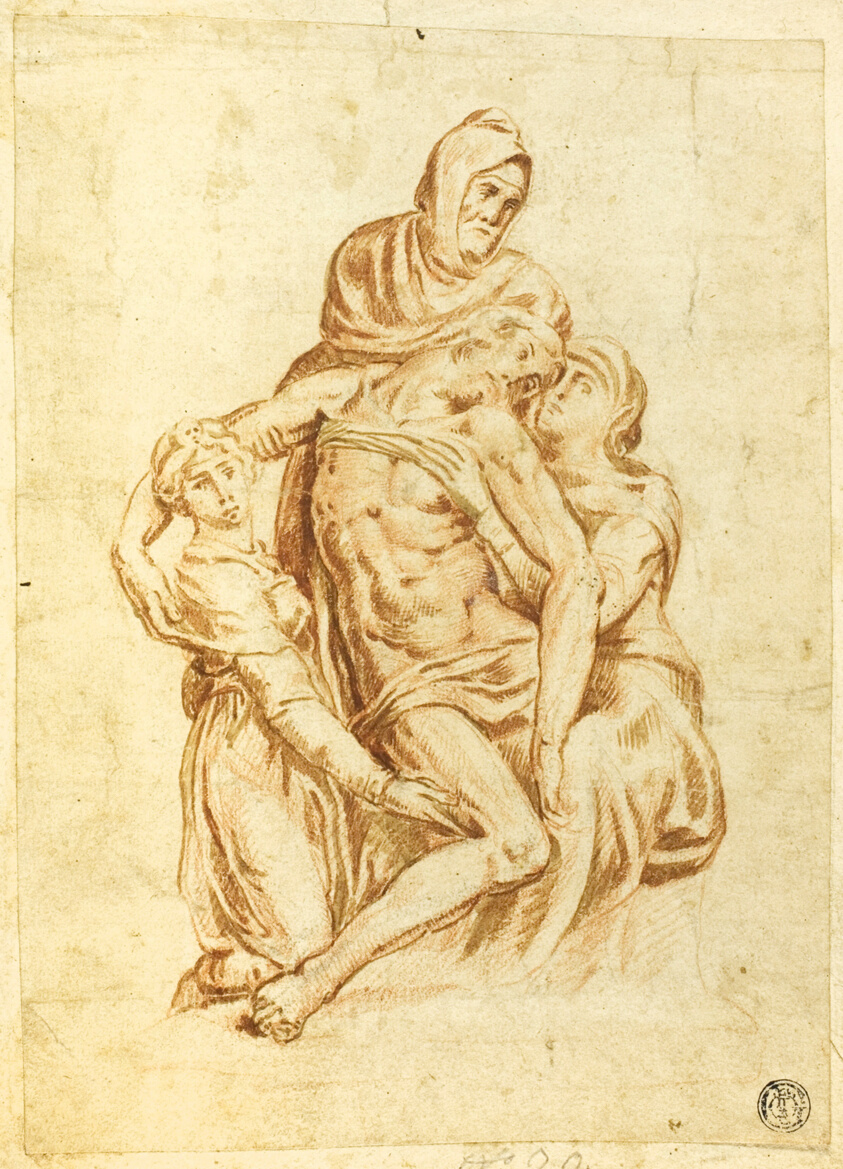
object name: Drawing and Watercolor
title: Deposition of Christ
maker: after Michelangelo Buonarroti; Italian, 1475-1564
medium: Brush and brown ink, heightened with red chalk, over graphite, on cream laid paper, laid down on cream laid paper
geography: Italy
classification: ink with chalk; drawings (visual works); prints and drawing